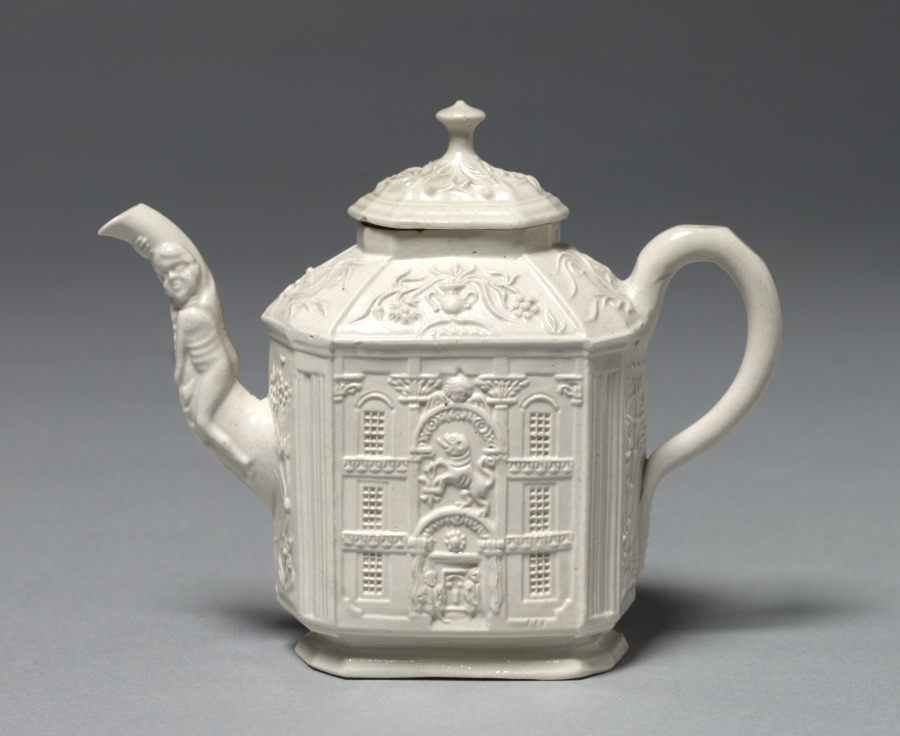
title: Teapot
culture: England, Staffordshire, 18th century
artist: Staffordshire Factory (British)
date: c. 1745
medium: salt-glaze earthenware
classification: Ceramic